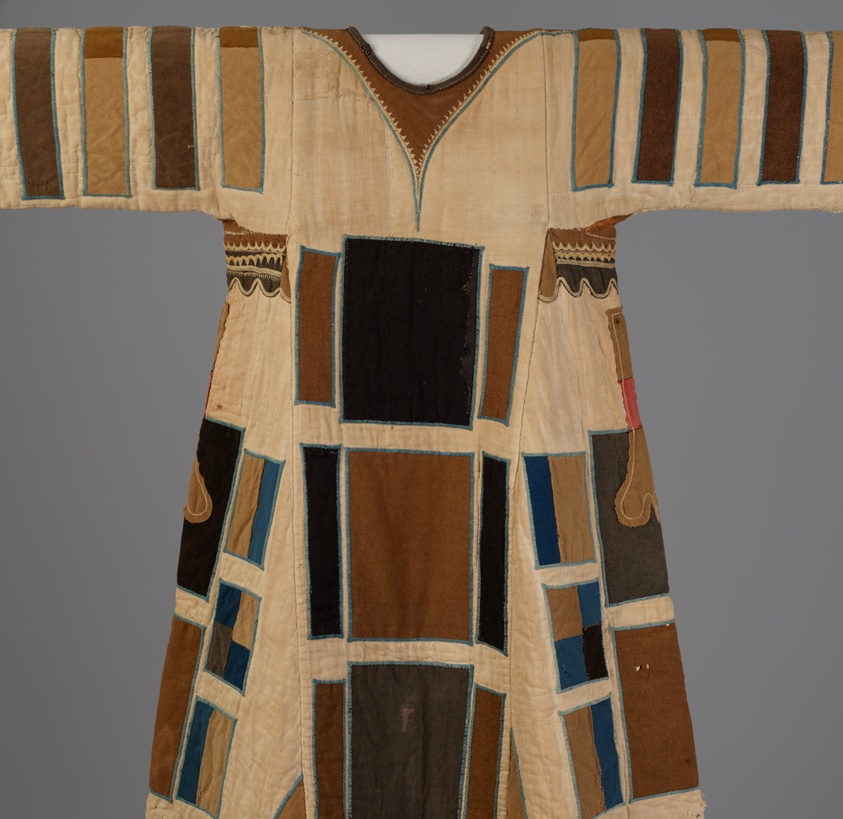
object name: Costume and Accessories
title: Tunic (Jibbeh)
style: Arts of Africa, 19th century, east african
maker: Mahdiyya State, Sudan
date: 1885/99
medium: Layers of cotton, plain weave; pieced and quilted; appliquéd with wool and wool and cotton plain weaves and wool twill weaves; embroidered with cotton in chain, cross, and a derivative of herringbone stitches; applied plied yarn edging; lined with cotton plain weaves; pieced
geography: Sudan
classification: tunic; arts of Africa; costume; garment; textile; dress (garment)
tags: garment, rectangles, black (color), tan (color), brown (color), lines, colonialism, Freedom, military, military uniforms, soldiers, uniforms